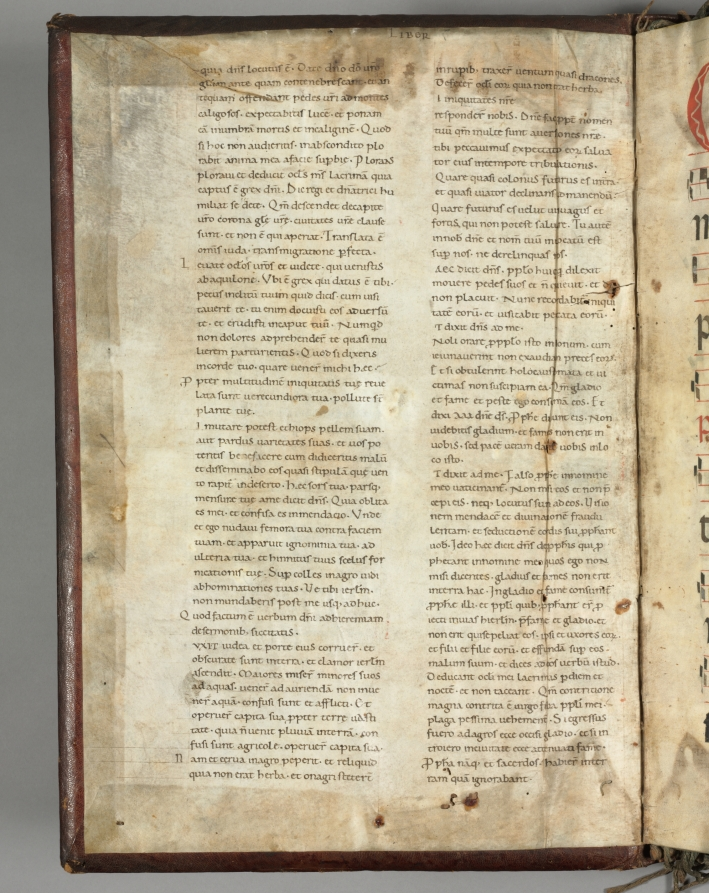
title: Choir Book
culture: Italy, 16th century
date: 1500s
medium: leather binding, copper alloy buckles, lead seal, parchment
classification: Manuscript